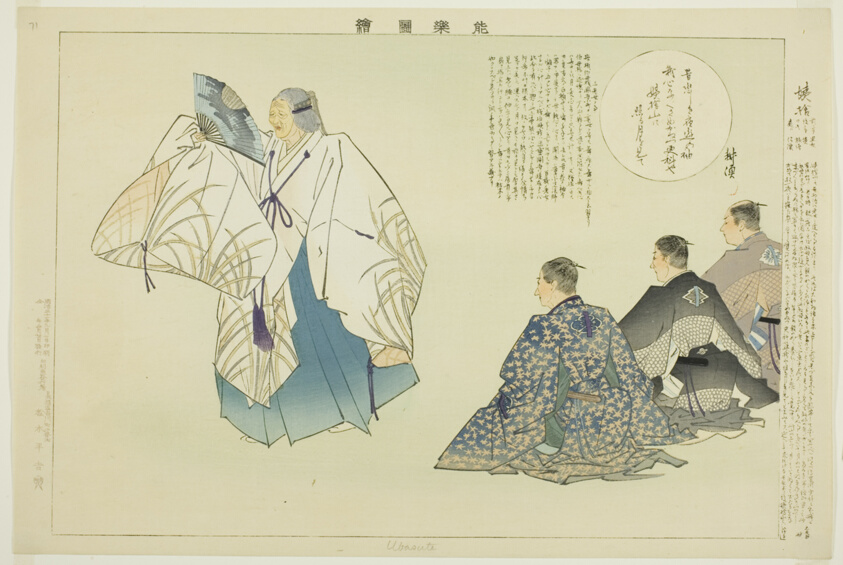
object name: Print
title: Oba-sute, from the series "Pictures of No Performances (Nogaku Zue)"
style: Japanese (culture or style)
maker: Tsukioka Kogyo; Japanese, 1869-1927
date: 1898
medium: Color woodblock print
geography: Japan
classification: woodblock print; print; asian art